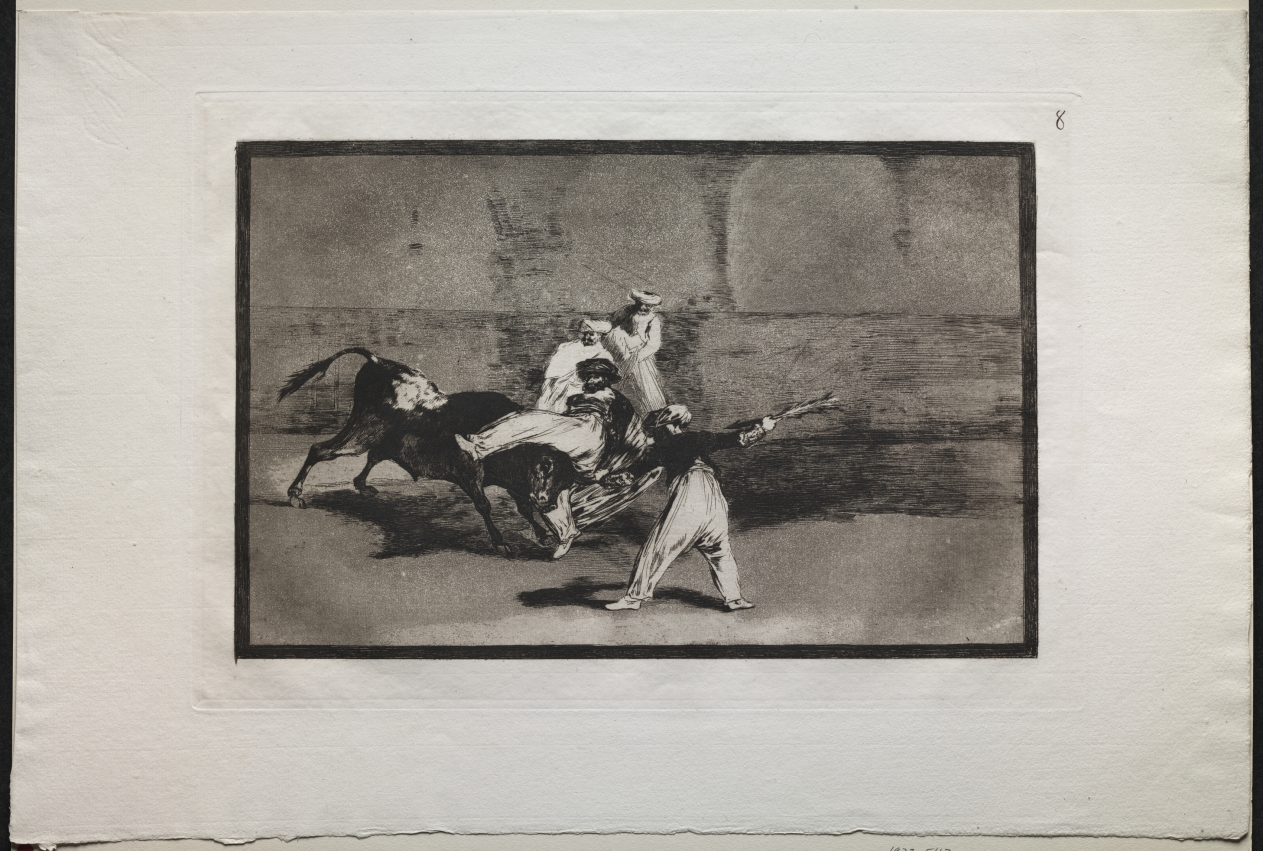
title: Bullfights: A Moor Caught by a Bull in the Ring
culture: Spain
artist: Francisco de Goya (Spanish, 1746–1828)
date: 1816, printed 1876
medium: engraving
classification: Print